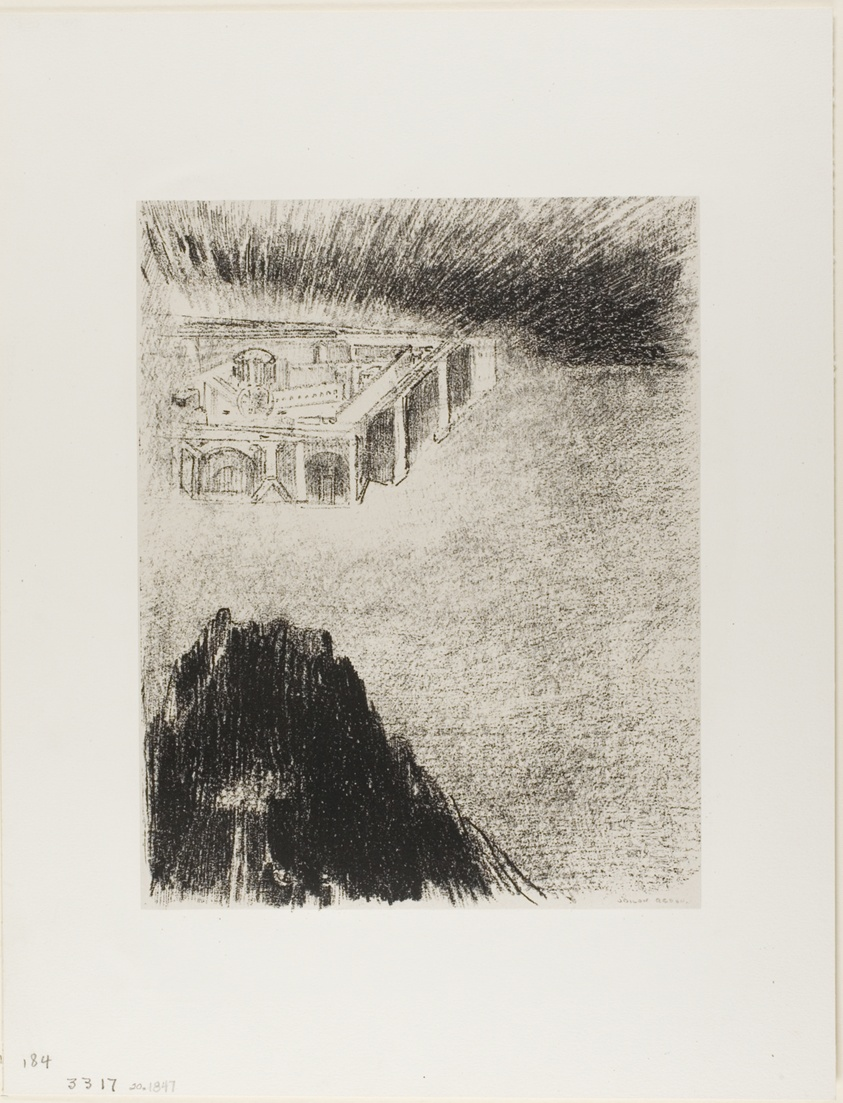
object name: Print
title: And I John Saw the Holy City, New Jerusalem, Coming Down from God Out of Heaven, plate 11 of 12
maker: Odilon Redon (French, 1840-1916)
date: 1899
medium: Lithograph in black on light gray China paper laid down on ivory wove paper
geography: France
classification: lithograph; print; prints and drawing; paper